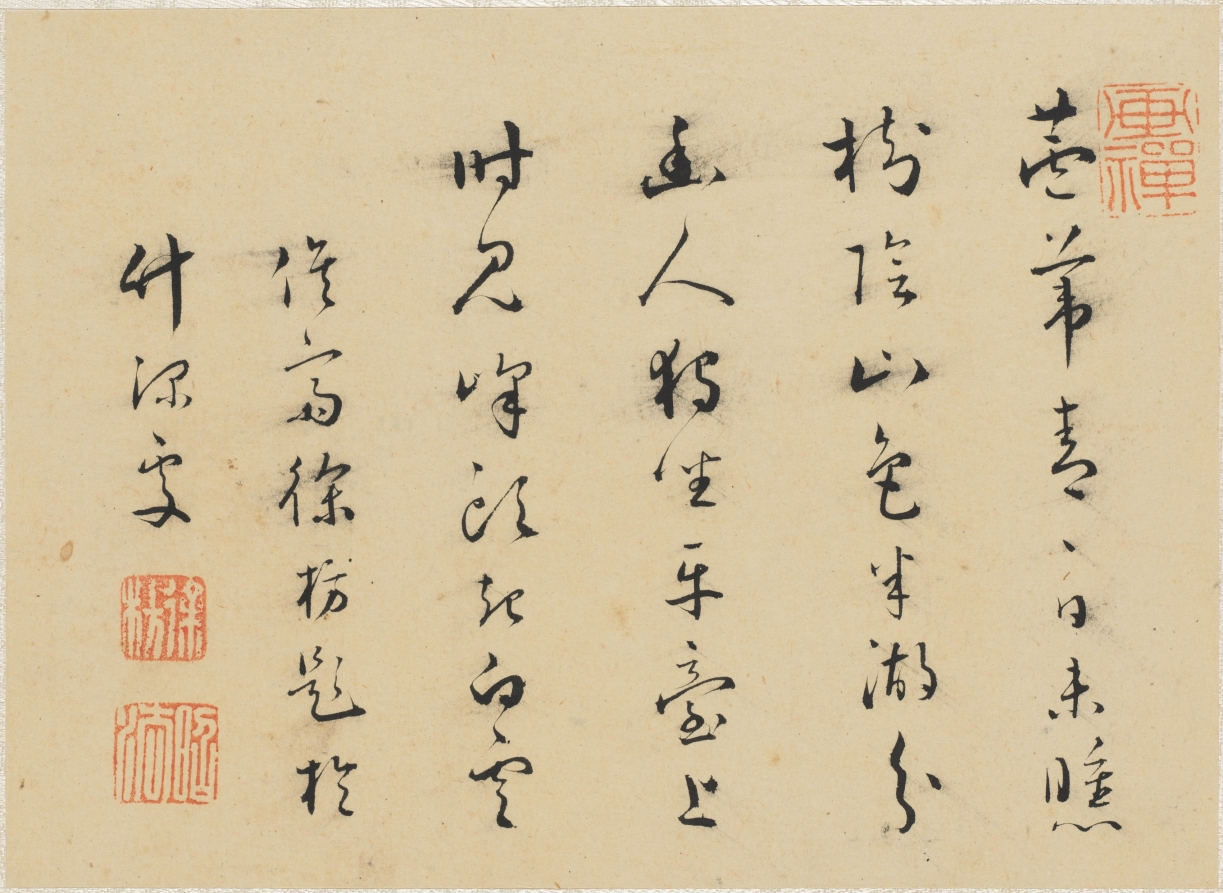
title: Album of Miscellaneous Subjects, Leaf 3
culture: China, Qing dynasty (1644-1911)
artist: Fan Qi (Chinese, 1616–after 1694)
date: early 1650s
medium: album leaf, ink and color on silk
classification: Painting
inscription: Artist seal: Fan Qi 樊圻. Poem by Xu Fang 徐枋 (1622–1694): Green are the reeds, the sun not yet set;/ Tree foliage and mountain colors divide the lake in two halves./ A solitary recluse sits upon a flat bluff,/ Occasionally observing white clouds rising from the mountain tops.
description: Fan Qi's painting for the third leaf of the album evokes Wang Wei's poetic line: Sit and watch the clouds rising. Xu Fang's calligraphic colophon reads: Green are the reeds, the sun not yet set; Tree foliage and mountain colors divide the lake into two halves. A solitary recluse sits upon a flat bluff, Occasionally observing white clouds rising from the mountain tops.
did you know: A waterfall descends between two mountains; the series of cascades is hinted by the careful placement of intermittent rocks.